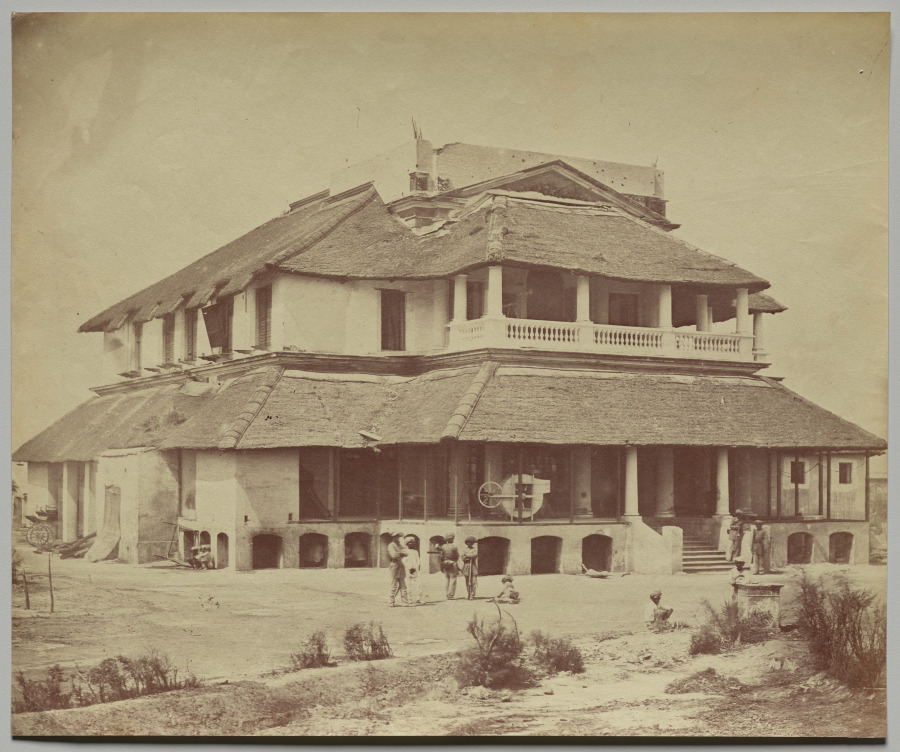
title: Bank's House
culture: England, 19th century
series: Lucknow After the Siege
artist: Felice A. Beato (British, 1832–1909)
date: 1858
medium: albumen print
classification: Photograph